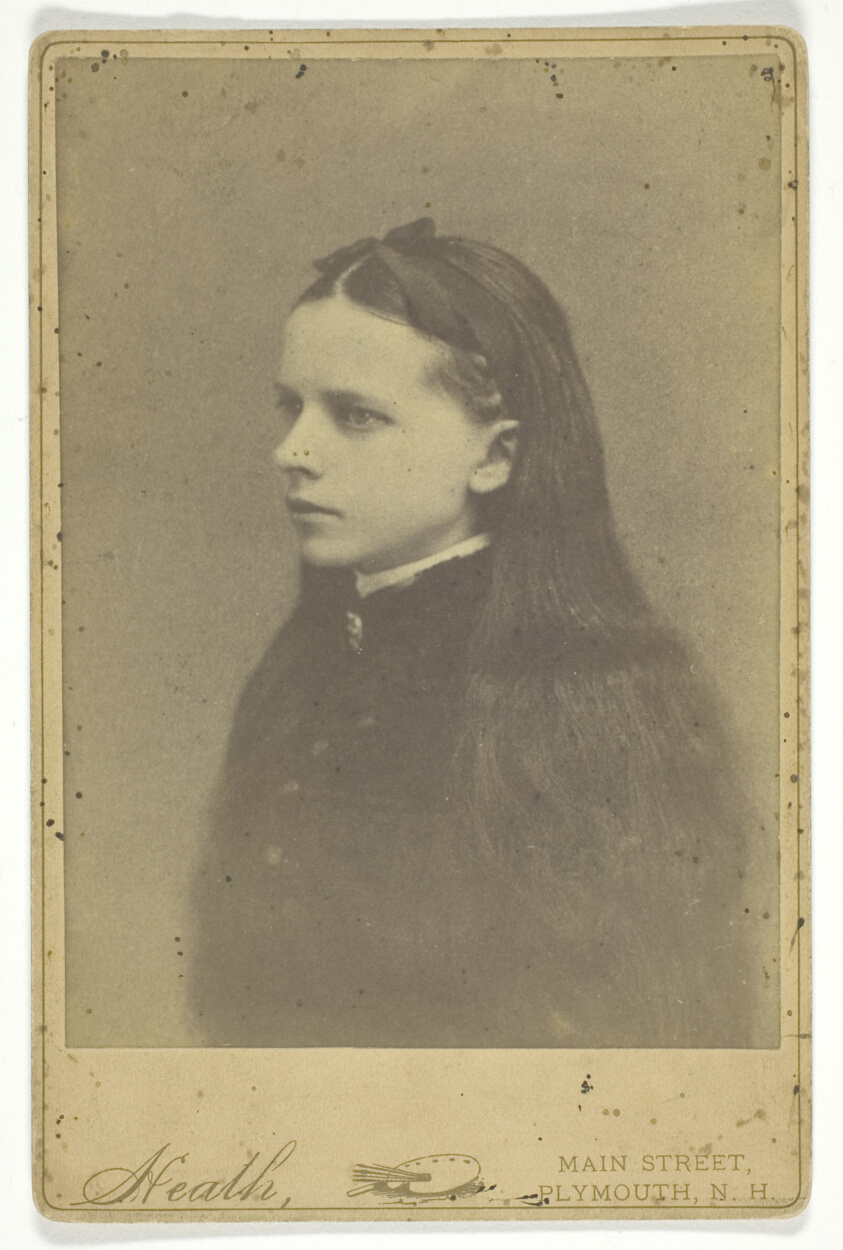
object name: Photograph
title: Untitled (girl with long hair)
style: 19th century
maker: H. S. Heath; American, 19th century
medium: Albumen print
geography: United States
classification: photography; photograph